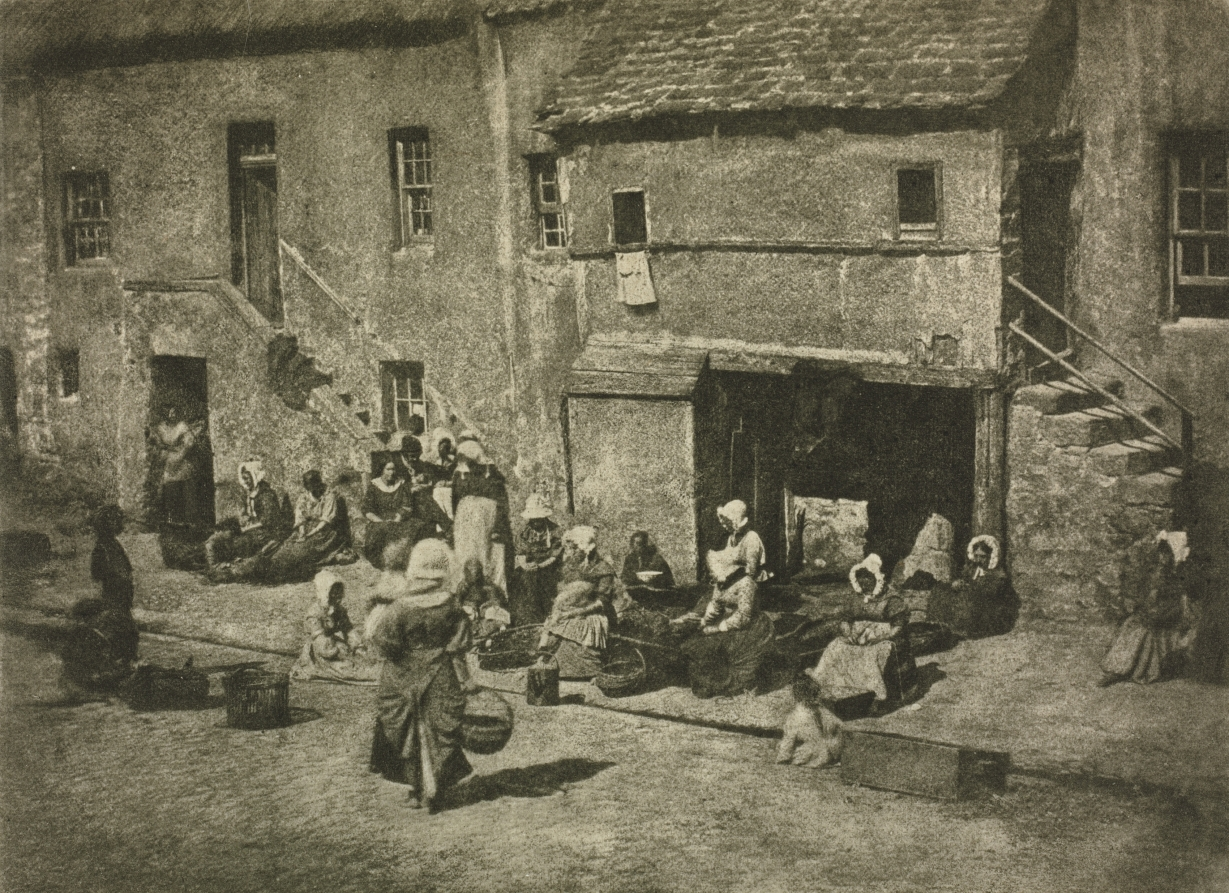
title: Camera Work: Newhaven Fisheries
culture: England, 20th century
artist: David Octavius Hill (British, 1802–1870)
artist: and Robert Adamson (British, 1821–1848)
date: 1909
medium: photogravure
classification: Bound Volume